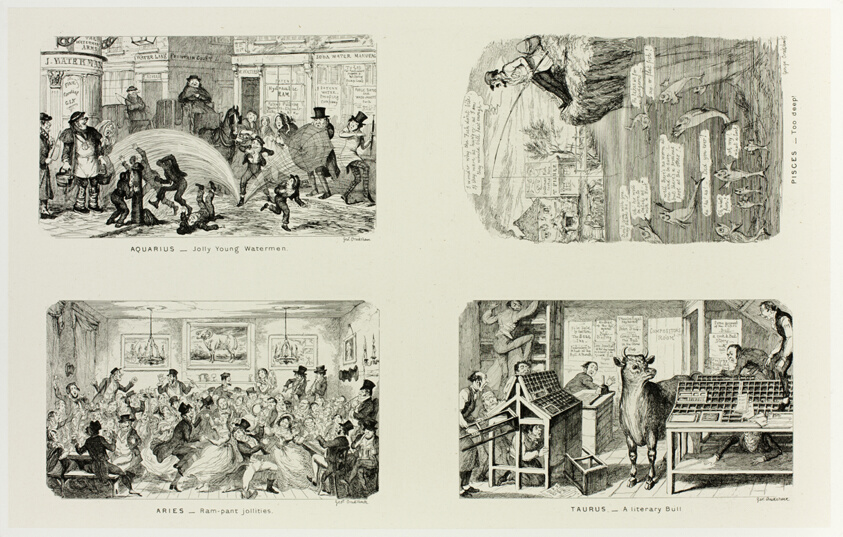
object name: Print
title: Aquarius - Jolly Young Watermen from George Cruikshank's Steel Etchings to The Comic Almanacks: 1835-1853 (top left)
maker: George Cruikshank (English, 1792-1878); published by Pickering & Chatto (English, 19th century)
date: 1846, printed c. 1880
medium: Four steel etchings in black on cream India paper, laid down on off-white card (chine collé)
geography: England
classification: etching; paper; print; prints and drawing